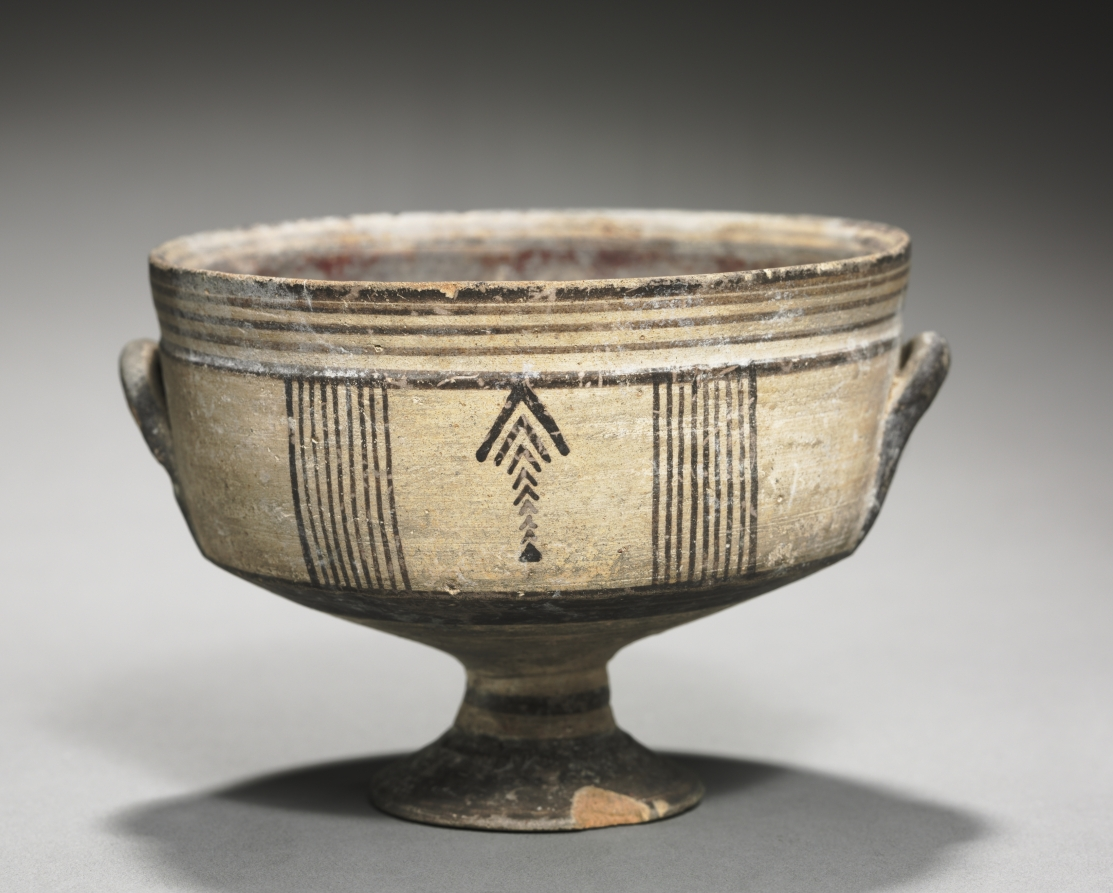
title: Footed Bowl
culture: Cyprus, Cypro-Geometric III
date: c. 850–750 BCE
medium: white painted ware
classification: Ceramic